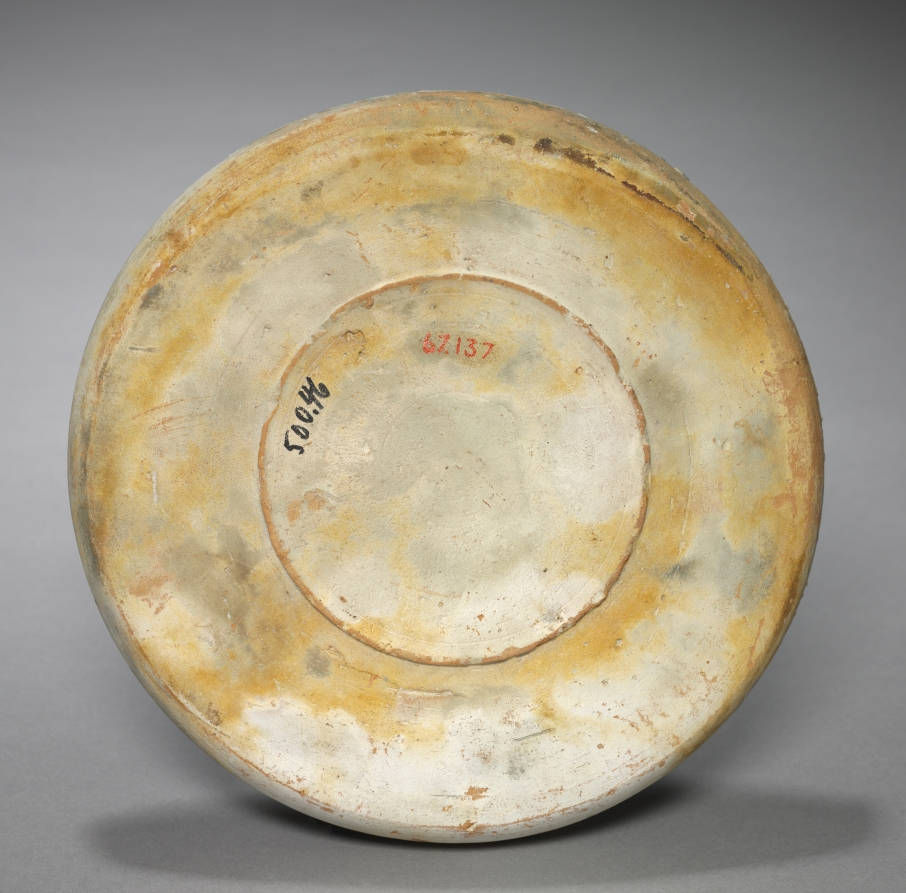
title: Deep Plate with Decorative Patterns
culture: Byzantium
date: 1100s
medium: sgraffito earthenware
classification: Ceramic